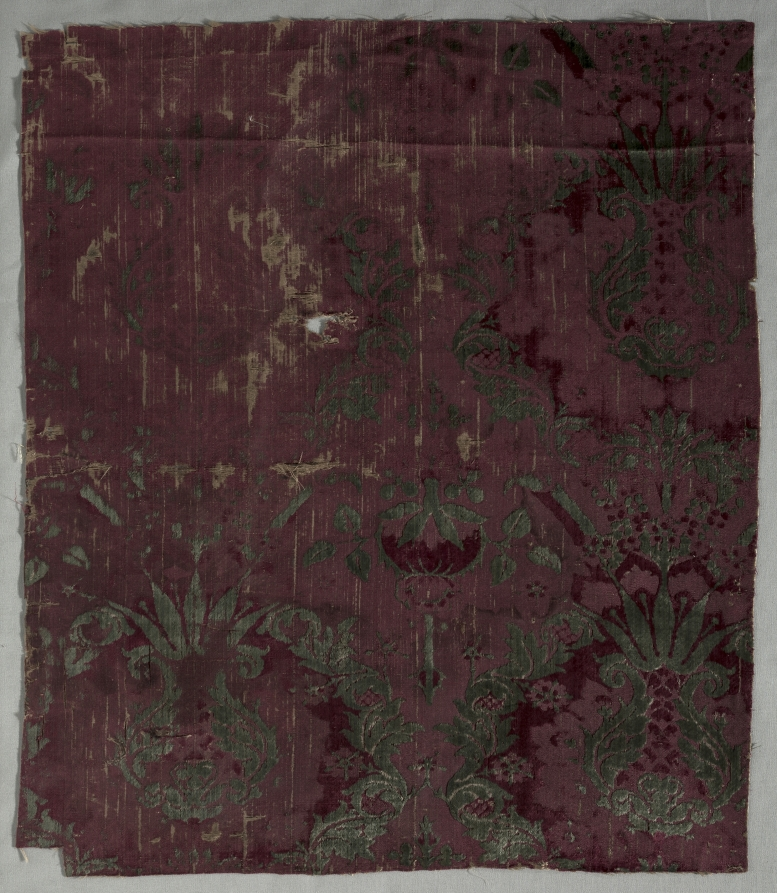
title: Velvet Fragment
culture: Italy, late 15th-early 16th Century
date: c. 1500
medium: velvet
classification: Velvet